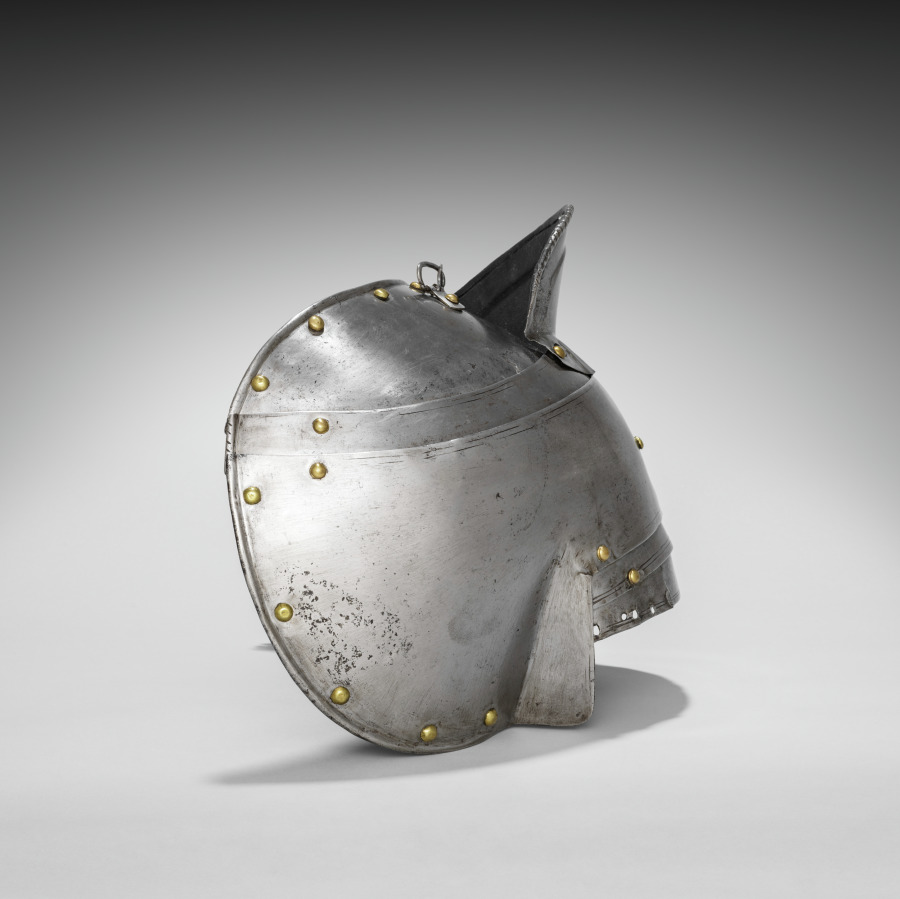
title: Pauldron (proper right) and Gardbrace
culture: South Germany, 16th century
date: c. 1560–1580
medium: steel, leather straps, brass rivets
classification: Arms and Armor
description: This armor was developed for the joust--a sporting combat between two mounted contestants. Although all of the elements of this armor date from the same period, they are not all from the same suit. This armor is thus called "composed." It also shows the asymmetry of jousting armor. The participants rode along a wall-like barrier known as a "tilt" with their left sides facing one another. Consequently, armor on that side of the body had to be thicker. Note the large plate (grandguard) over the left shoulder for extra protection. Also, the breathing holes in the helmet were placed on the right side (farthest from an opponent's lance) to avoid injuries from splinters. The bracket attached to the right breastplate is called the lance-rest, a shock-absorbing support designed to accommodate the lance when "couched" under the right armpit.